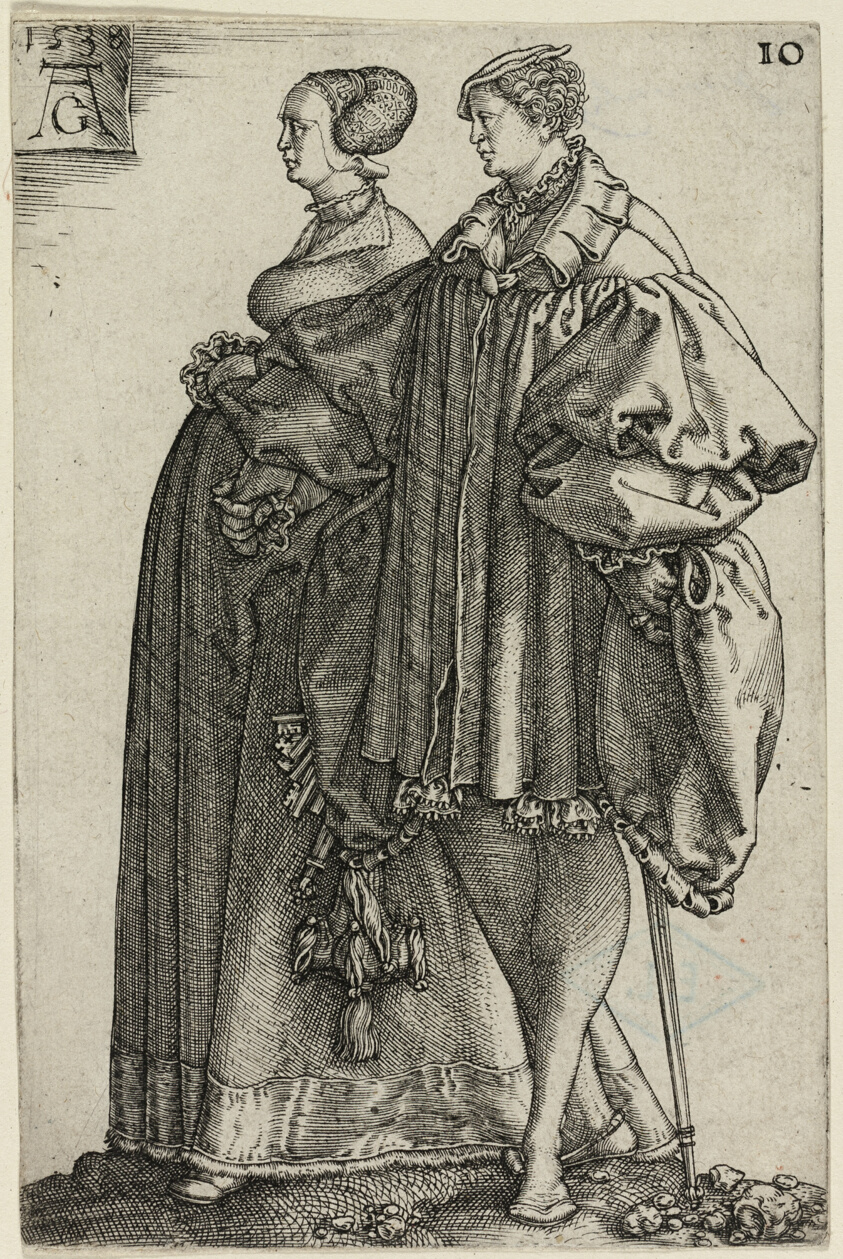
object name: Print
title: Dancing Couple, plate ten from The Large Wedding-Dancers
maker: Heinrich Aldegrever (German, 1502-c.1560)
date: 1538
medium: Engraving in black on ivory laid paper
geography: Germany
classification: engraving; print; prints and drawing